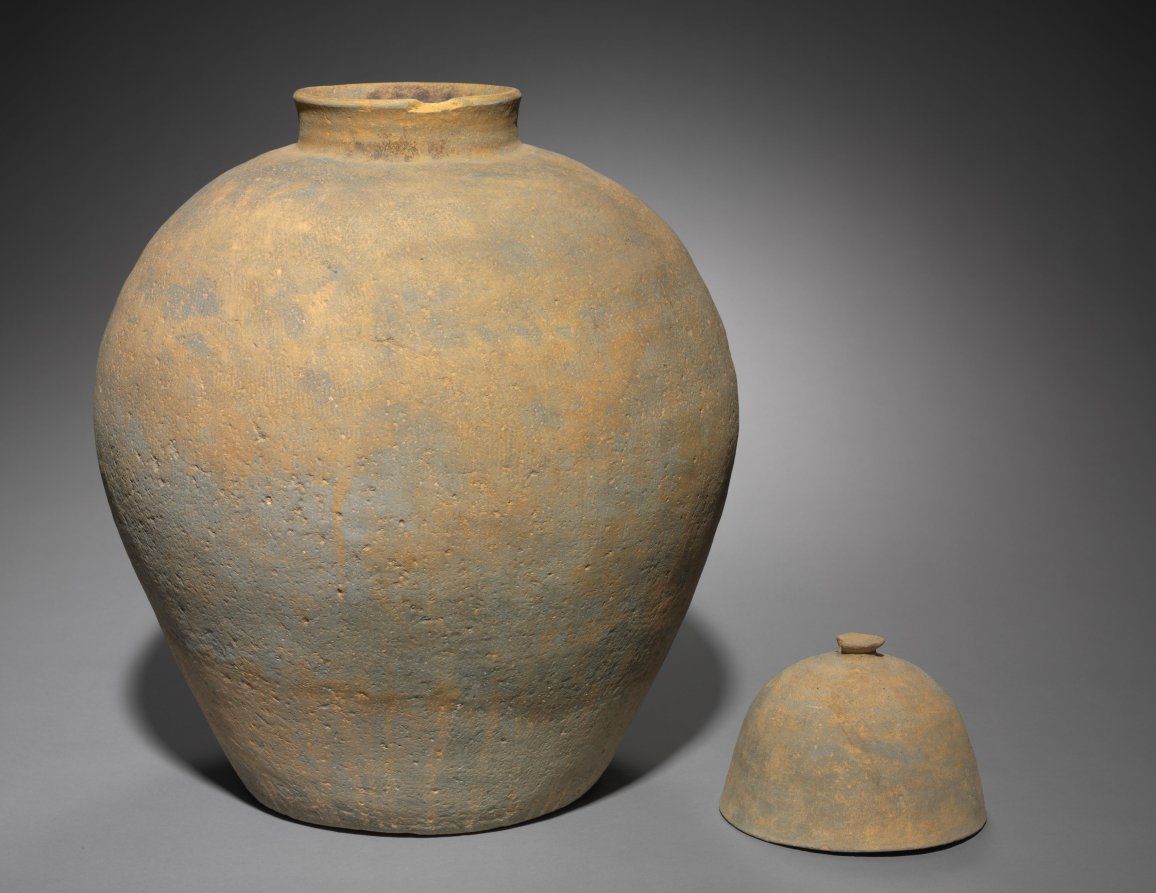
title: Burial Urn with Cover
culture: Korea, Three Kingdoms period (57 BCE–668 CE)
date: 300s–500s CE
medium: earthenware with impressed design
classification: Ceramic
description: Produced in closed kilns built on hillsides during the Three Kingdoms period, this lidded jar once contained the cremated remains of the dead. This type of burial jar became widespread after the introduction of Buddhism, as cremation became a common practice in Korea.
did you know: Closed kilns built on hillsides became widely used for producing this type of pottery vessel in Korea during the Three Kingdoms period.